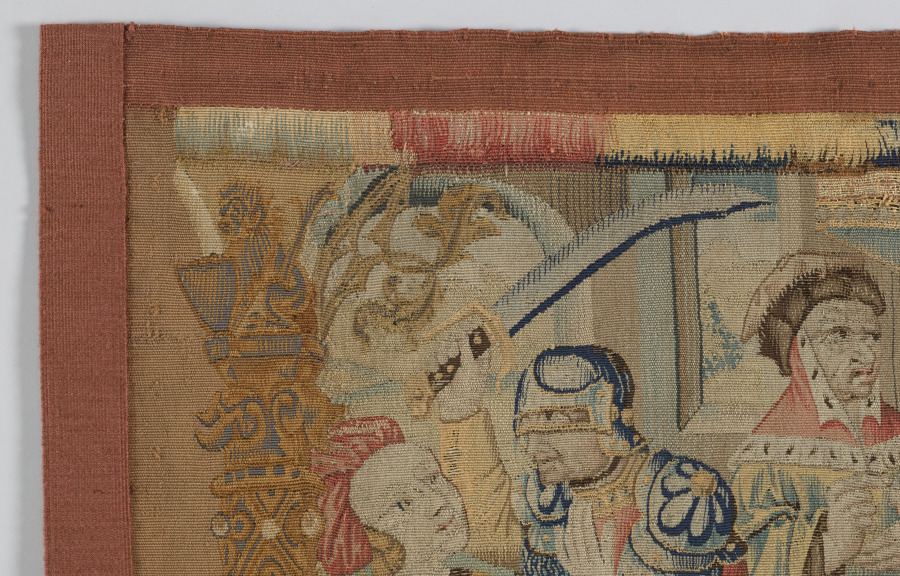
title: Altar Frontal: Scenes from the Childhood of Christ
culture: France and South Netherlands, 1500s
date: c. 1500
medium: Wool, silk, gold thread; tapestry weave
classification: Tapestry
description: Pictorial tapestries were symbols of wealth and more highly prized than paintings. Small tapestries with Christian imagery were frequently commissioned to embellish the fronts of altars. This example displays the Massacre of the Innocents, the Flight into Egypt, and Christ among the Doctors. Tapestry weave is ideal for creating narrative scenes. The technique can be compared to painting, as each colored weft (horizontal thread) is interlaced with warps (vertical thread) where needed for the pattern. As expensive investments, tapestries have the advantage of being portable and easily stored and displayed.